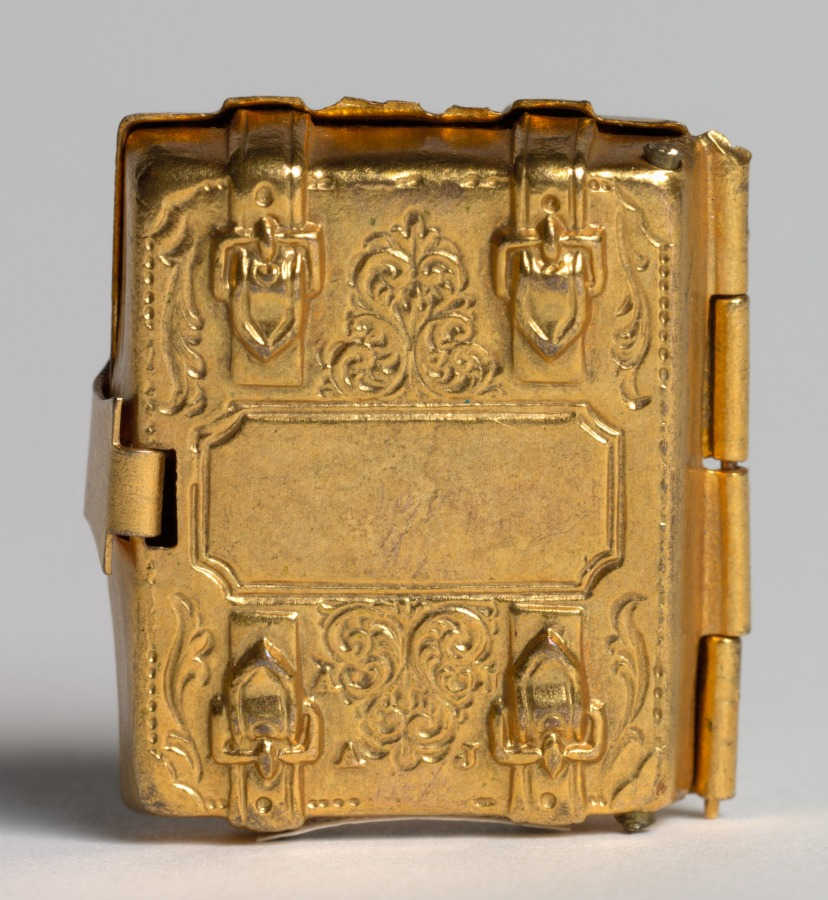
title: Somebody's Luggage (Miniature Wedding Album of Tom Thumb and Lavinia Warren)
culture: America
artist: Mathew Brady (American, 1823–1896)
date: c. 1863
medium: brass photographic locket with 12 miniature albumen prints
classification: Jewelry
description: This deluxe commercial souvenir commemorates the marriage of “General” Tom Thumb (Charles Sherwood Stratton) and Lavinia Warren, performers at P. T. Barnum’s American Museum. Thumb was such a celebrity that the wedding pushed the Civil War off newspapers’ front pages for days. Cartes-de-visite of the wedding sold in the thousands; Brady even licensed the image to lithographers and other photographers. In one image, Lavinia holds a baby who was borrowed for the photo shoot to suggest her domestic skills. The locket is shaped like a miniature suitcase bearing the words “Somebody’s Luggage,” the title of an 1862 story by Charles Dickens.